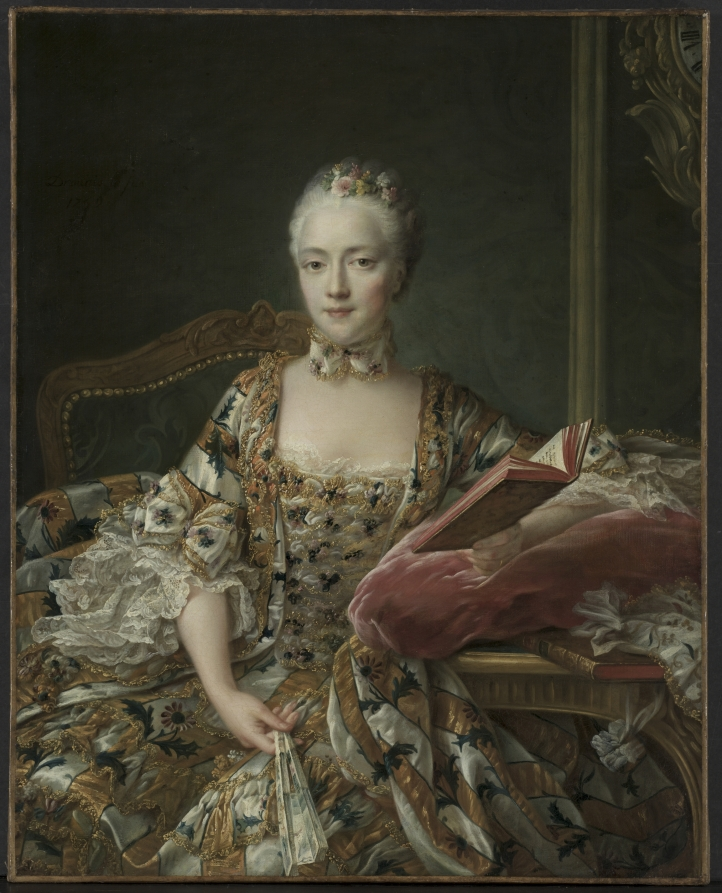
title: Portrait of the Marquise d'Aguirandes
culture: France, 18th century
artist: François Hubert Drouais (French, 1727–1775)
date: 1759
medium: oil on canvas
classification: Painting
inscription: Signed upper left: "Drouais fecit 1759"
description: Like many French portraitists active during the ancien régime, François-Hubert Drouais was skilled at veiling the physical imperfections of his subjects. This portrait certainly has this quality: the face has been idealized, smoothed, and perfected, but the focus of the painting is less on the Marquise and more on her elegant gown, which is a particularly fine rendering of eighteenth-century printed cloth, with the brilliant gold and white fabric strewn with meticulously detailed flowers and lace.